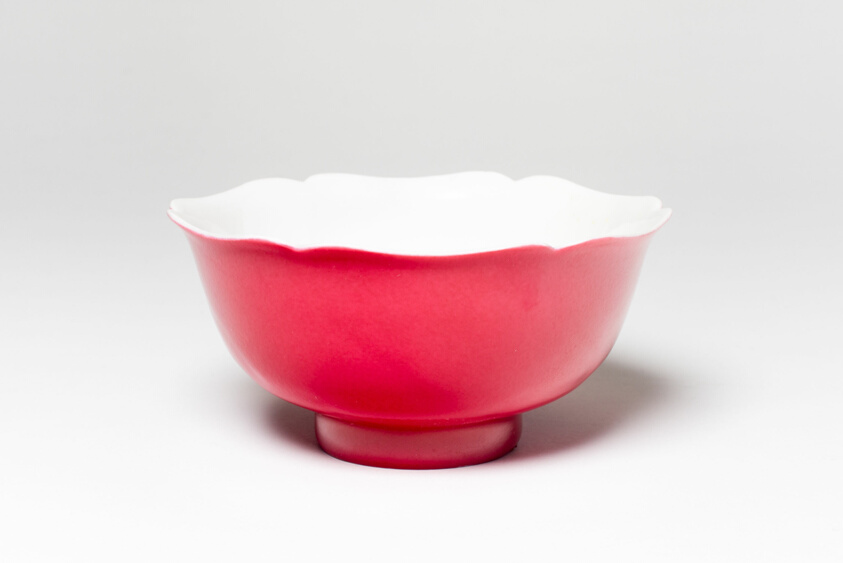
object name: Vessel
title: Bowl with Foliate Rim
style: Chinese (culture or style)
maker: China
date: Qing dynasty (1644–1911), late 18th/19th century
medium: Porcelain with ruby pink glaze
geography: China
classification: bowl; porcelain; dish (vessel); asian art; ceramics; vessel